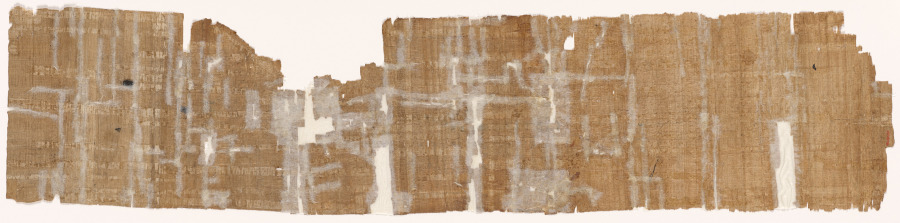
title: Book of Amduat, Perhaps of Bakenmut, with Elements of the Tenth through Twelfth Hours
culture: Egypt, Third Intermediate (1069–715 BCE), Dynasties 21–22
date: 1000–900 BCE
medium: papyrus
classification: Funerary Equipment